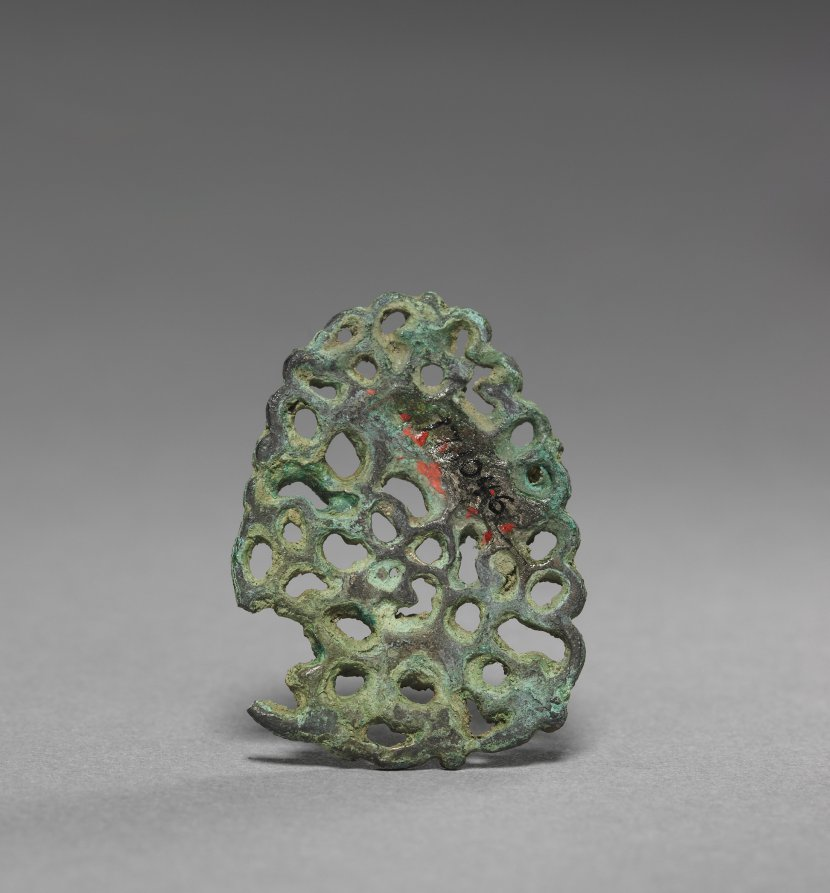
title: Ornament with Heron and Turtle Design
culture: Korea, Goryeo dynasty (918–1392)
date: 1100s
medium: bronze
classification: Metalwork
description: Metalworking techniques advanced remarkably during the Goryeo period (918–1392). Sophisticated metal objects with intricate designs were used not only as daily accessories, but also as burial goods for commemorating the dead. Traces of fibers found on the backs of these metal ornaments suggest that they were once used as brooches to hold garments together.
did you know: This metal ornament is part of a decorative brooch once used to hold clothes together.